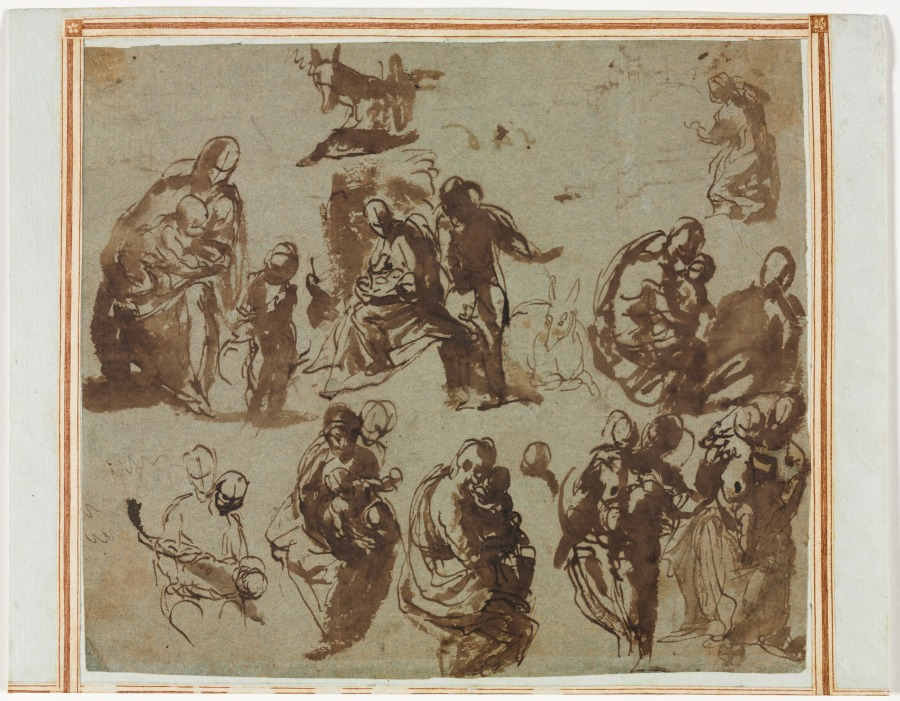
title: Various Sketches of the Madonna and Child (recto); Architectural Studies (verso) [partially visible on recto]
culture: Italy, Venice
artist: Paolo Veronese (Italian, 1528–1588)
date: c. 1570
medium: pen and brown ink (iron gall) and brush and brown wash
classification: Drawing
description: In the last decades of his career, Paolo Veronese and his workshop produced a number of idyllic visions of the Holy Family in repose in the countryside during their flight into Egypt. This crowded sheet of loose, lively sketches was recently proposed to have inaugurated an intensive period of interest in this subject that began around 1570. The sheet shows two horizontal rows with eight versions of the seated Virgin holding the Christ Child, in some of the sketches accompanied by the infant John the Baptist or Joseph, and in one by a donkey. The sheet presents an unusual case of being preparatory not for paintings, but for finished chiaroscuro drawings, now in London, Berlin, and Cambridge, MA. While the individual sketches may appear at first glance a mass of tangled lines and confused forms, such pen and ink drawings demonstrate the Venetian artist's restless creative energy.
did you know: The sheet of paper was a more vibrant, pure blue when the drawing was made; aging has rendered the color of the sheet closer to a green-gray.